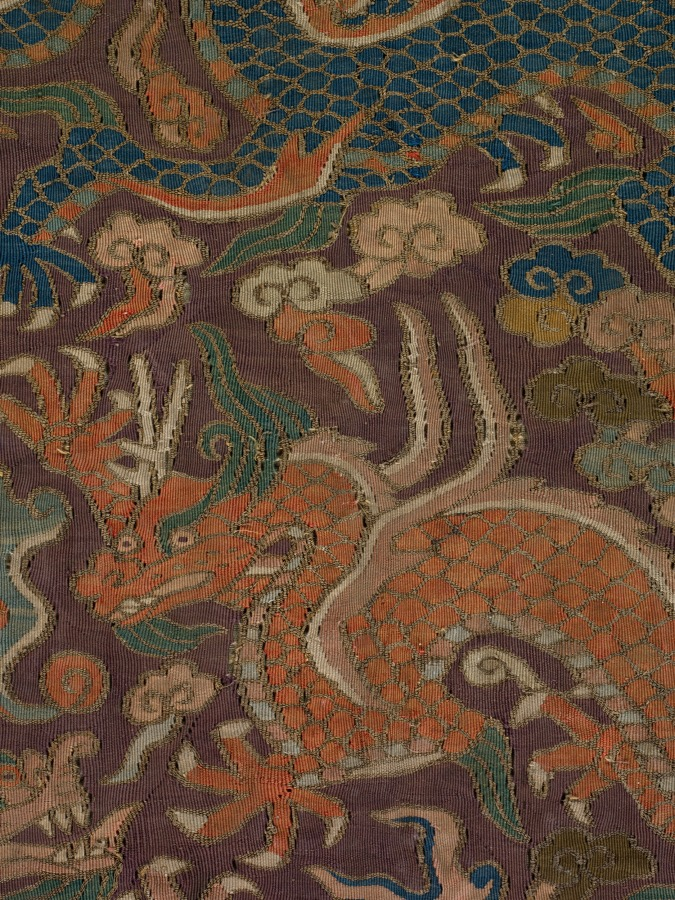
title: Dragons Chasing Flaming Pearls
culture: Central China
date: 1200s or earlier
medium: silk and gold thread: tapestry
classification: Textile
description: This rectangular, reversible tapestry (kesi) fragment, woven with silk and metal thread on a deep purple ground, is a section from yardage likely intended for a garment, but no contemporary paintings exist to confirm this. A selvage edge remains on the left; having an extant selvage edge provides us with information about the loom on which this textile was woven. The design motif of this kesi—dragons chasing flaming pearls—is Chinese. But the form of the dragons and the way they are crowded together is not Chinese. Rather than animals and birds among flowers, a frequently occurring pattern in the decorative art of eastern Central Asia that long predated the Mongol conquest, here the dragons are chasing flaming pearls. This deviation is indicative of the powerful influence of the Mongols.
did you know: The metal thread used in this weaving is fabricated from very thin strips of parchment with applied gold and silver leaf that are then wound around a core of yellow silk.